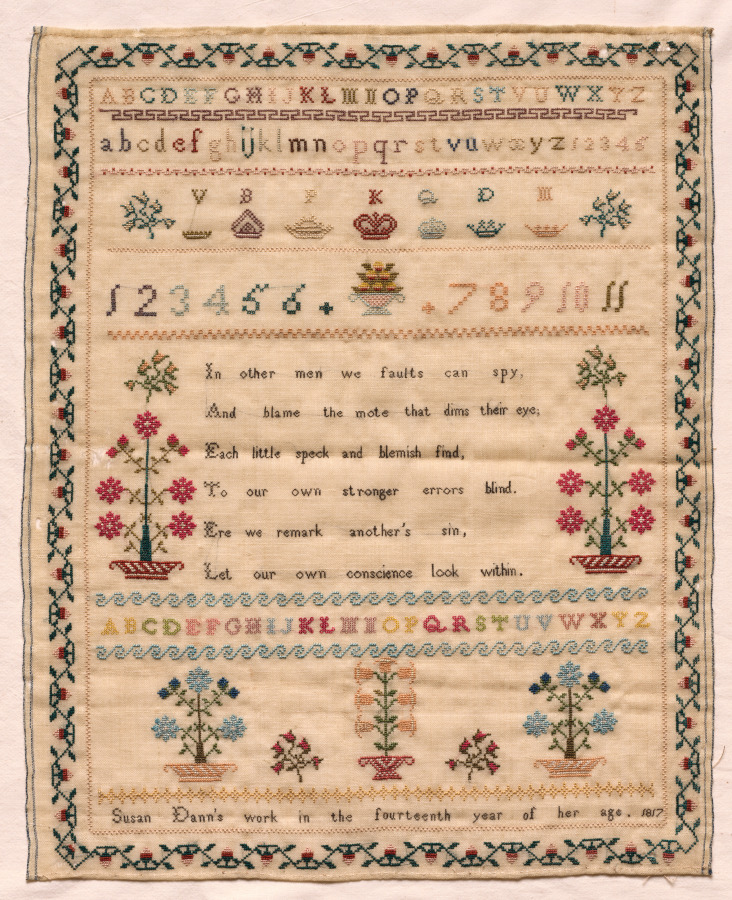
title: Sampler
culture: England, early 19th century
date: 1817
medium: embroidery; silk on woolen canvas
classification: Sampler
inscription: "ABCDEFGHIJKLMNOPQRSTVUWXYZ/ abcdefghijklmnopqrstvuwxyz12345/ [rows of coronets surmounted by descriptive initials] V[iscount] B[aron] P[rince] K[ing] Q[ueen] D[uke] M[arquis]/ 1 2 3 4 5 6 + +7 8 9 10 11/ In other men we faults can spy./ And blame the mote that dims their eye;/ Each little speck and blemish find,/ To our own stonger errors blind./ Ere we remark another's sin, Let our own conscience look within./ ABCDEFGHIJKLMNOPQRSTUVWXYZ/ Susan Dawn's work in the fourteenth year of her age. 1817."